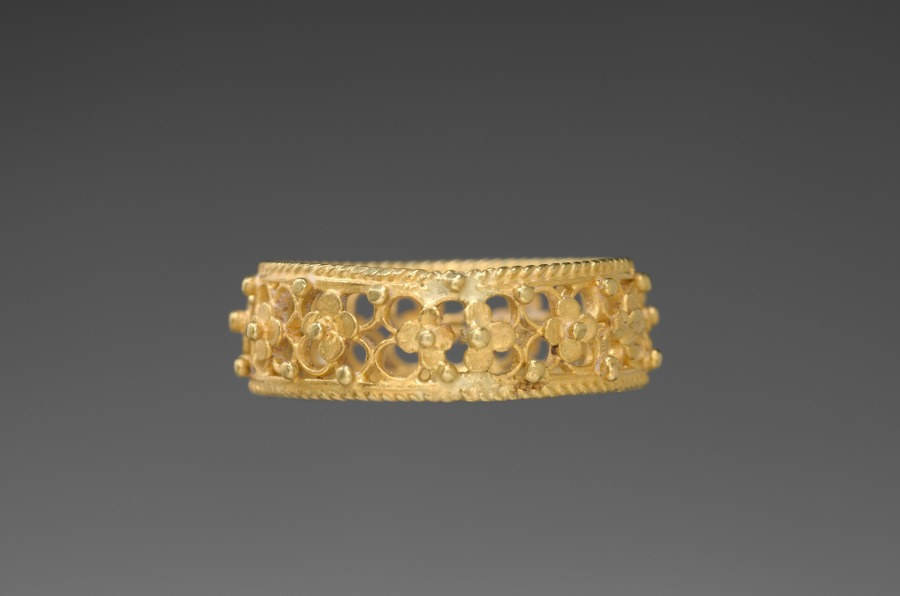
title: Ring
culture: India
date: early 1900s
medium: silver gilt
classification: Jewelry